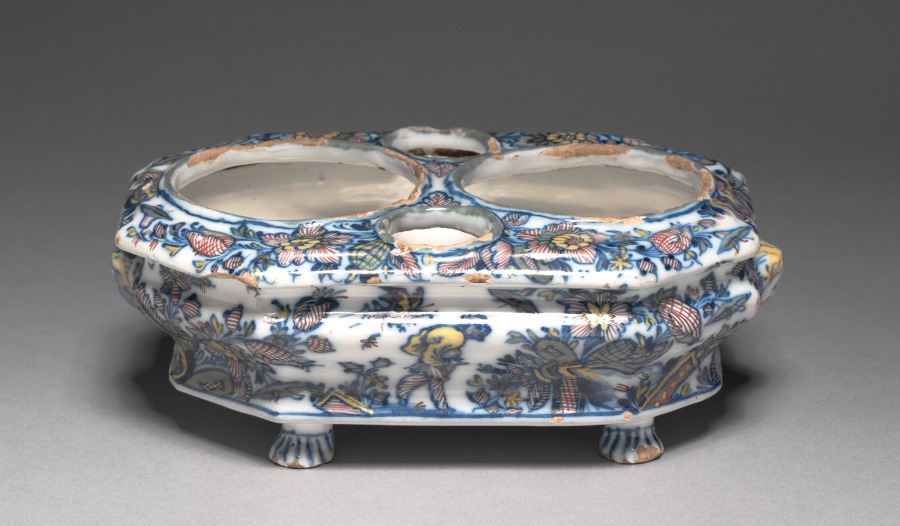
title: Cruet Set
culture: France, Marseilles, 18th century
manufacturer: Héraud- LeRoy Factory (French)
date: c. 1740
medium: Tin- glazed earthenware (faience) wth underglaze blue decoration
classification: Ceramic